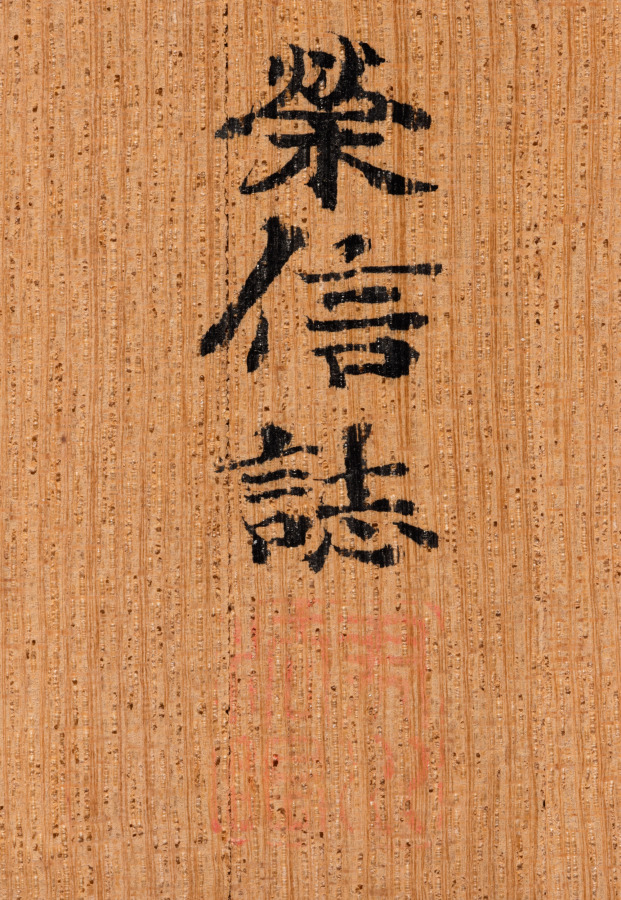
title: Reeds and Geese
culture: Japan, Kamakura period (1185–1333)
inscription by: Yishan Yining [Issan Ichinei] (Chinese, 1247–1317)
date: 1314–17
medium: hanging scroll; ink on paper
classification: Painting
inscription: signed: Issan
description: Reeds and geese has been a common pairing in Chinese literary and visual culture for many centuries. This painting presents the contribution of a Japanese amateur painter, almost certainly a Zen Buddhist monk, to Japan’s fledgling efforts to add the theme to its own cultural vocabulary in the early 1300s. As was customary at the time in Japan, the painter did not sign or seal his work; the inscription, a poem added to the painting by the eminent émigré monk Yishan Yining, along with his signature and seal, was of far greater cultural value. Today, the modestly sized painting has tremendous significance as one of the earliest surviving examples of Japanese ink paintings with reeds and geese.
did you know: Tokyo National Museum owns a copy of this painting made by Kano Gyokusen (1796–1864) when he was 14 years old.